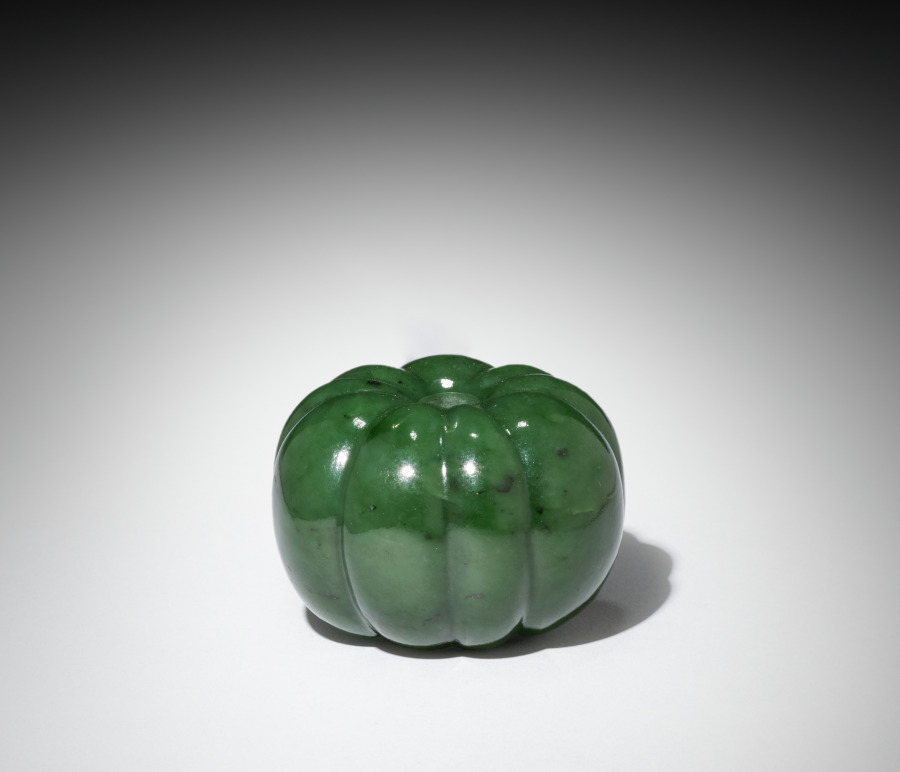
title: Stamp Moistener (Tomato)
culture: Russia, St. Petersburg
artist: firm of Peter Carl Fabergé (Russian, 1846–1920)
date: late 1800s-early 1900s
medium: jade, diamonds, gold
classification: Miscellaneous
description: This stamp moistener in the form of a green tomato is carved out of a single piece of jade. The stem, tipped by a diamond mounted in gold, is removable. The interior end of this stem holds the brush that is used to wet a stamp for letters.